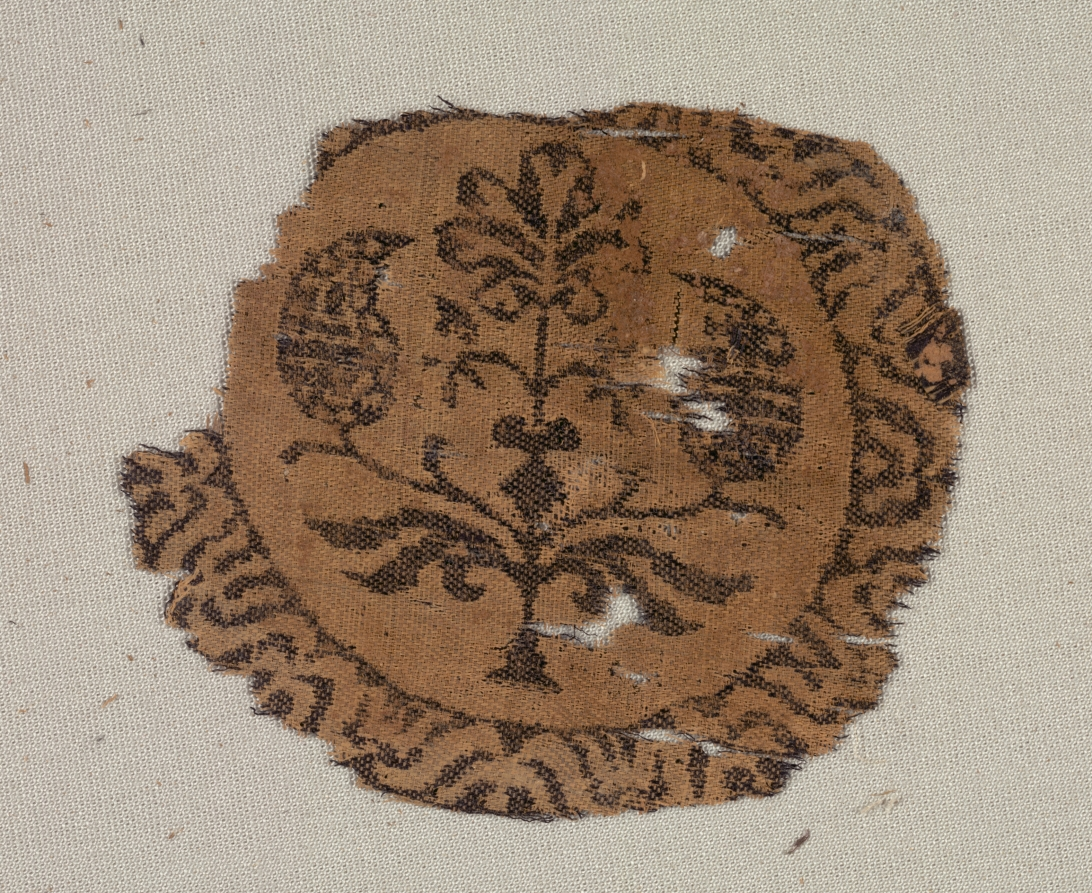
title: Fragment of a Segmentum with Palmette Tree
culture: Syria, Umayyad period (661–750) or Abbasid period (750–1258)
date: 700s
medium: Silk: compound twill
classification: Textile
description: Originally, these luxurious silk roundels, each with at least three matching pieces, were cut and sewn onto the front and back of a tunic, probably linen, in Egypt. They belong to a sizeable group of comparable silk decorations found in Akhmim, Egypt. In each roundel, a stylized palmette tree is enclosed within a simplified lotus border which evolved from an ancient Egyptian lotus motif. These delicate silks were woven on large looms with automatic pattern repetition, called drawlooms. Dark blue and ivory silk horizontal wefts dominate, interlaced by vertical warps in a diagonal twill weave. A second inner warp does not come to the surface; one inner warp is visible between each interlacing warp. This compound weave, with two warps, is often called complementary weft twill with inner warps (samit).